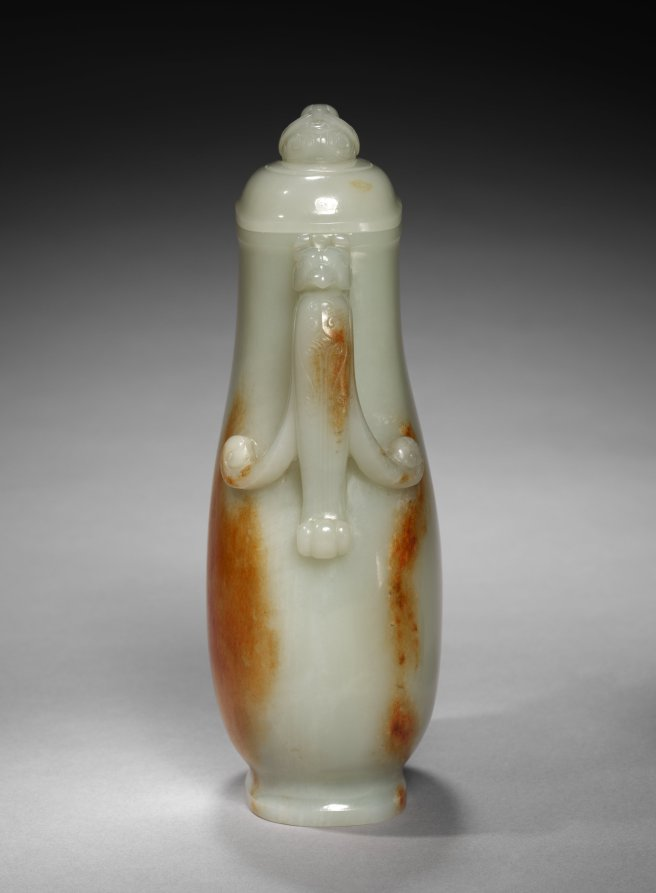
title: Pitcher (Gong) with Dragon and Bird-Headed Handle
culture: China, Qing dynasty (1644–1911)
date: 1700s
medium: pale greenish-white jade with brown markings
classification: Jade